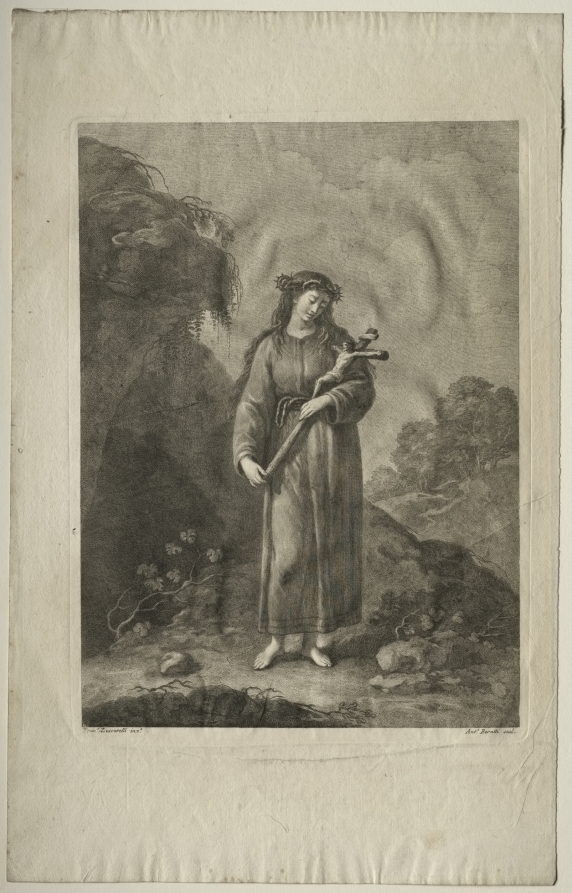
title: The Mortification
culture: Italy, 18th century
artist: Antonio Baratti (Italian, 1724–1787)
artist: after Francesco Zuccarelli (Italian, 1702–1788)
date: mid-1700s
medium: engraving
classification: Print